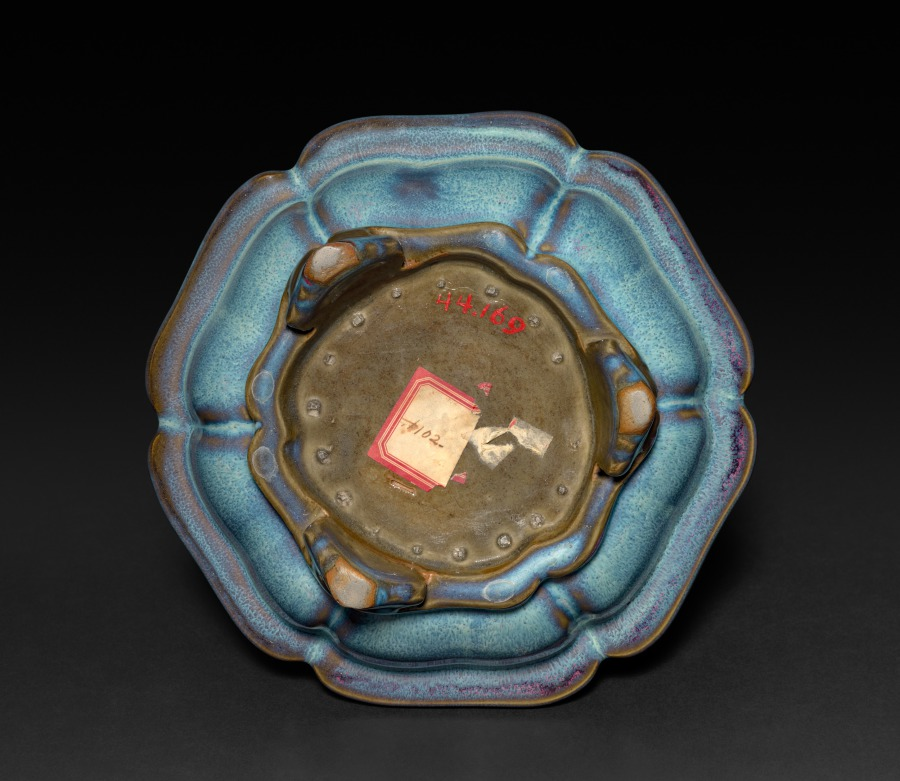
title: Flower Pot Stand or Bulb Bowl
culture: China, possibly Henan province, Yuan dynasty (1271-1368) - Ming dynasty (1368-1644)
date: 1300s–1400s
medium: glazed gray stoneware, Jun ware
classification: Ceramic